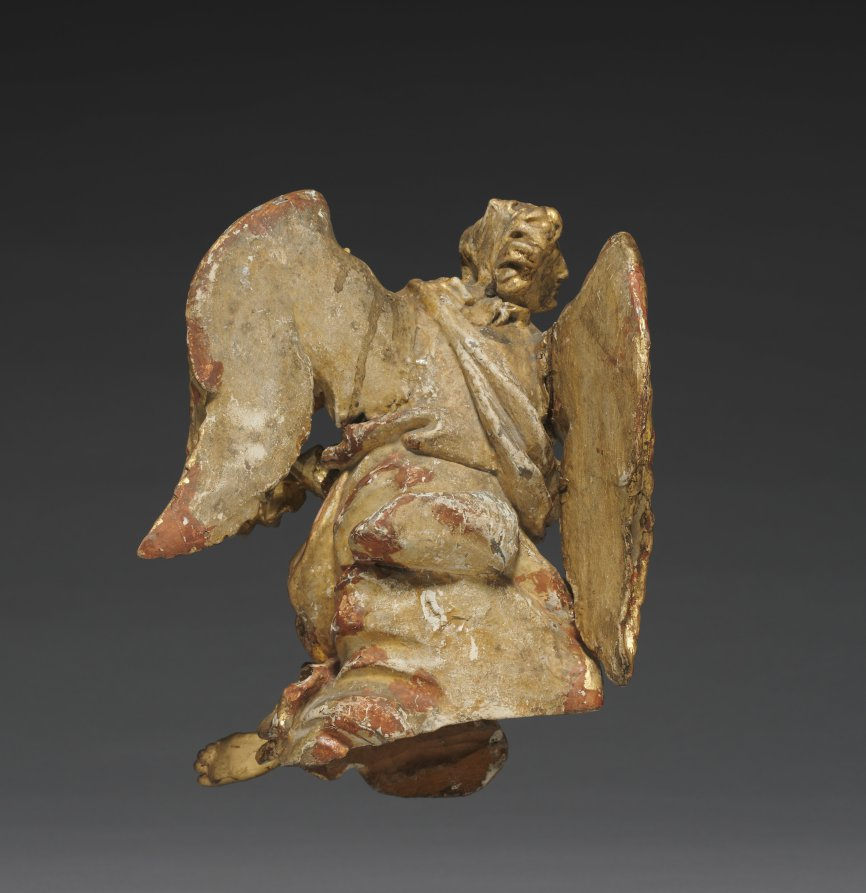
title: Altarpiece with Relics - Angel, lower right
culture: Germany, Bavaria, 18th century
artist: Joseph Matthias Götz (German, 1696–1760)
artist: and Workshop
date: c. 1735–1740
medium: gilded wood, with relics in niches: gilded wood, mother-of-pearl, ebony, red silk, gold wire, seed pearls, rock crystal, pen and ink on paper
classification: Sculpture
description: Götz covers every surface in gold leaf, giving each part of the object equal importance, rather than simply framing a central picture. In this distinctively Central European approach, figural narrative is subordinate to the overall ensemble. Götz designed this object to rest on top of an altar, probably in front of a larger painted or sculpted decorative scheme. The work contains relics seen through the small windows on the perimeter. These small remains of holy figures demonstrate the persistence of a medieval Catholic tradition well into the 1700s.